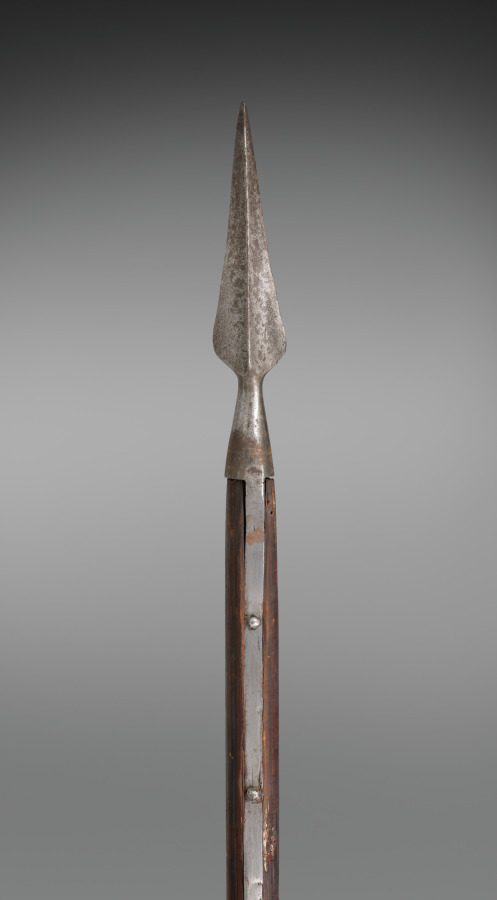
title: Pole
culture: Spain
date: 1700s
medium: wood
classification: Arms and Armor